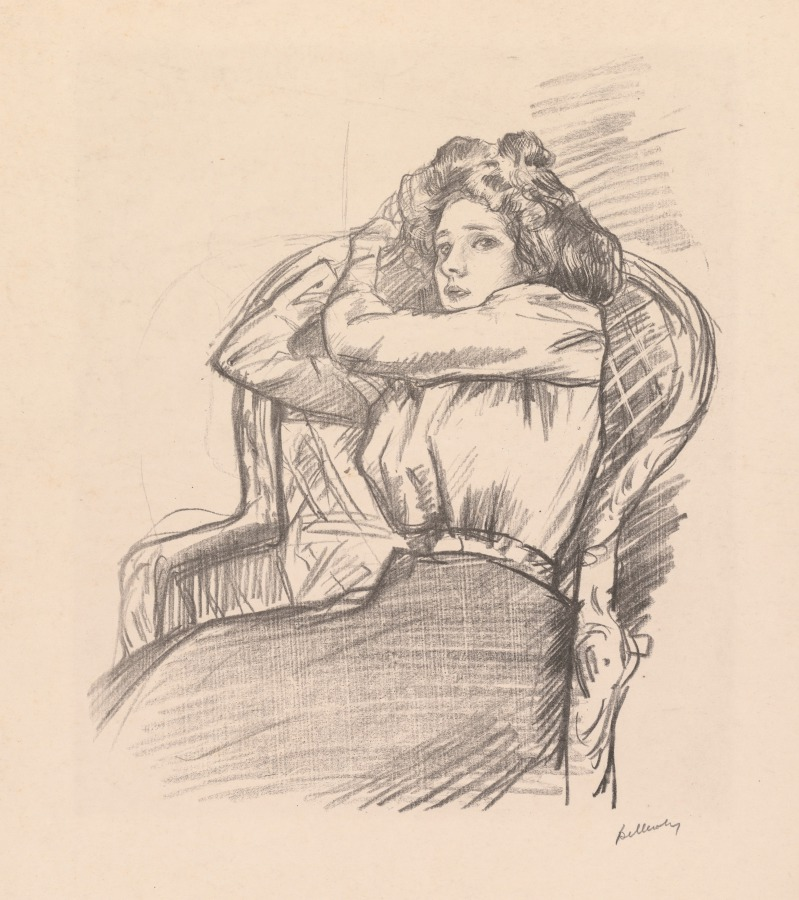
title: Untitled ("Babette")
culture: Britain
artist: Albert de Belleroche (British, 1864–1944)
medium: Lithograph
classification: Print